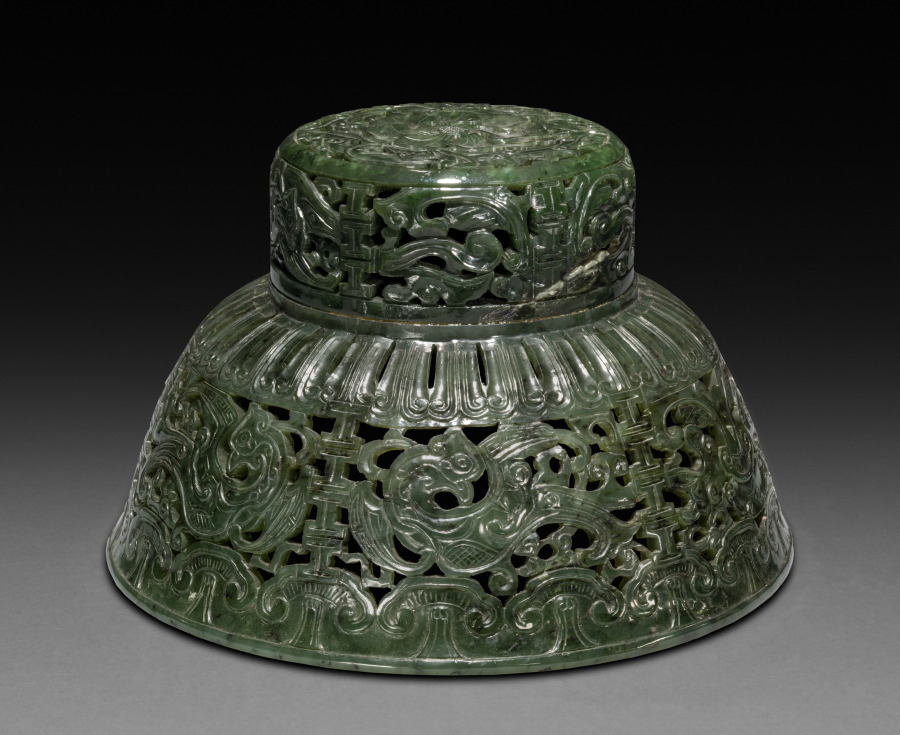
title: Koro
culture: China, Qing dynasty (1644–1911), Qianlong reign (1736–95)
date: 1736–95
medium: jade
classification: Jade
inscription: Qianglong mark on base